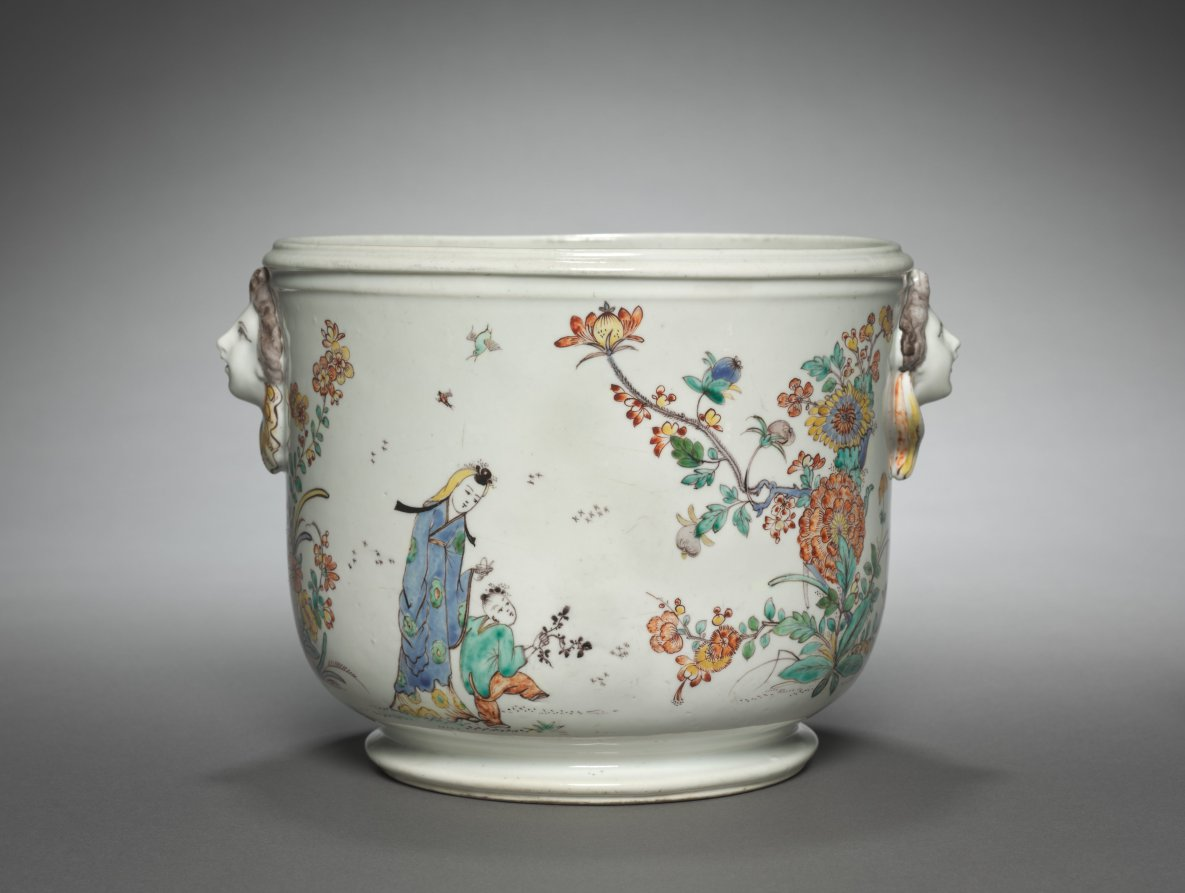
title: Bottle Cooler (seau à bouteille)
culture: France, Mennecy, 18th century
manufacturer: Mennecy- Villeroy Factory (French)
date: c. 1755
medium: Tin-glazed soft-paste porcelain with enamel decoration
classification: Ceramic